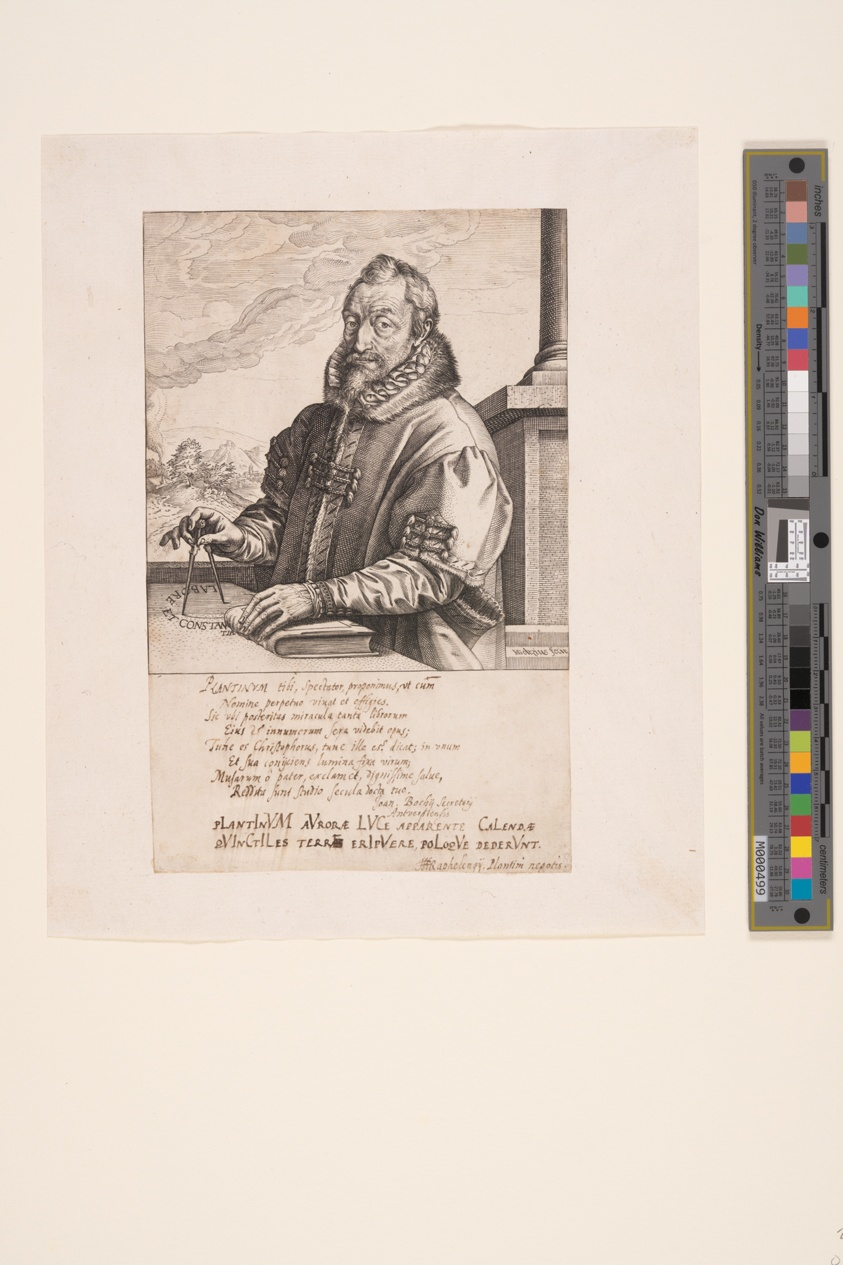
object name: Print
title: Christopher Plantin, Publisher in Antwerp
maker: Hendrick Goltzius (Dutch, 1558–1617)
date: c. 1589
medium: Engraving on laid paper, with additions in pen and ink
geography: Netherlands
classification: engraving; paper; print; prints and drawing